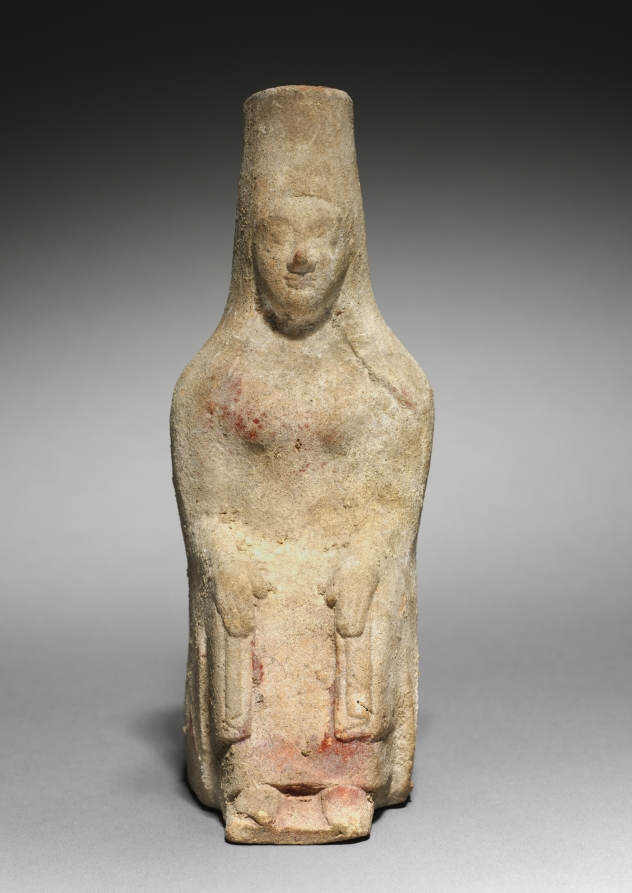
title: Seated Goddess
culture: Greece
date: 500s BCE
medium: terracotta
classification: Sculpture